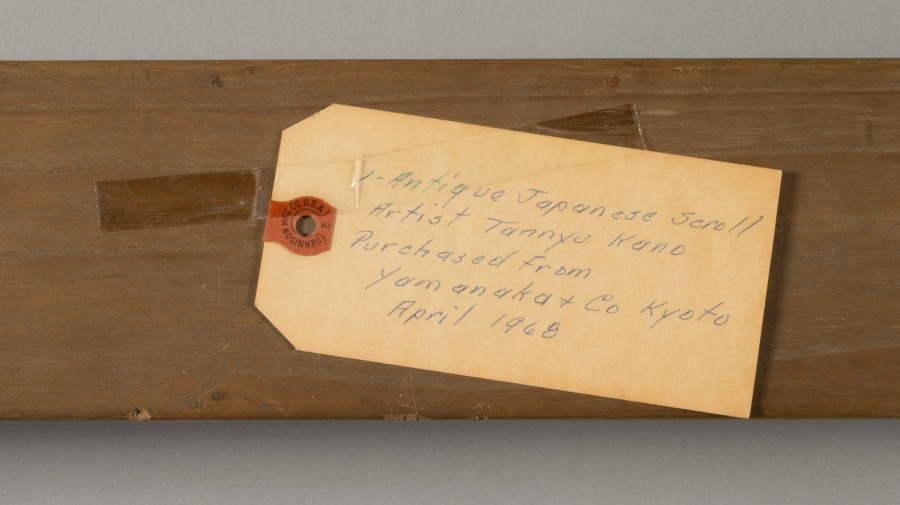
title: Chinese Sages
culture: Japan, Edo period (1615–1868)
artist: attributed to Kano Tan’yū (Japanese, 1602–1674)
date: mid- to late 1600s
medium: hanging scroll; ink and color on silk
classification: Painting